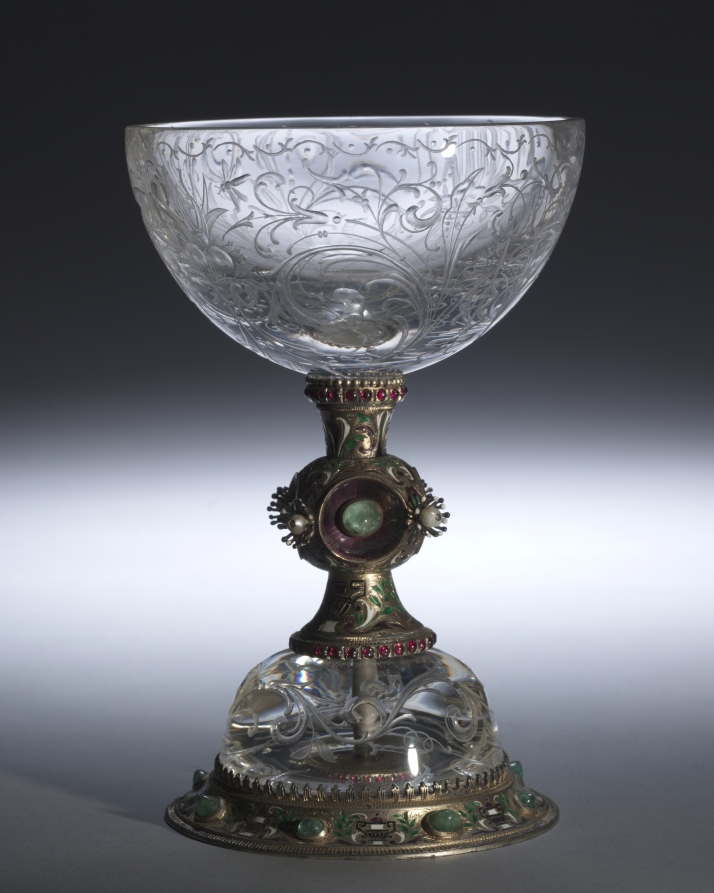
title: Chalice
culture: Austria, Vienna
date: c. 1850–75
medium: rock crystal, gilded and enameled silver, pearls, emeralds, precious stones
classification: Miscellaneous